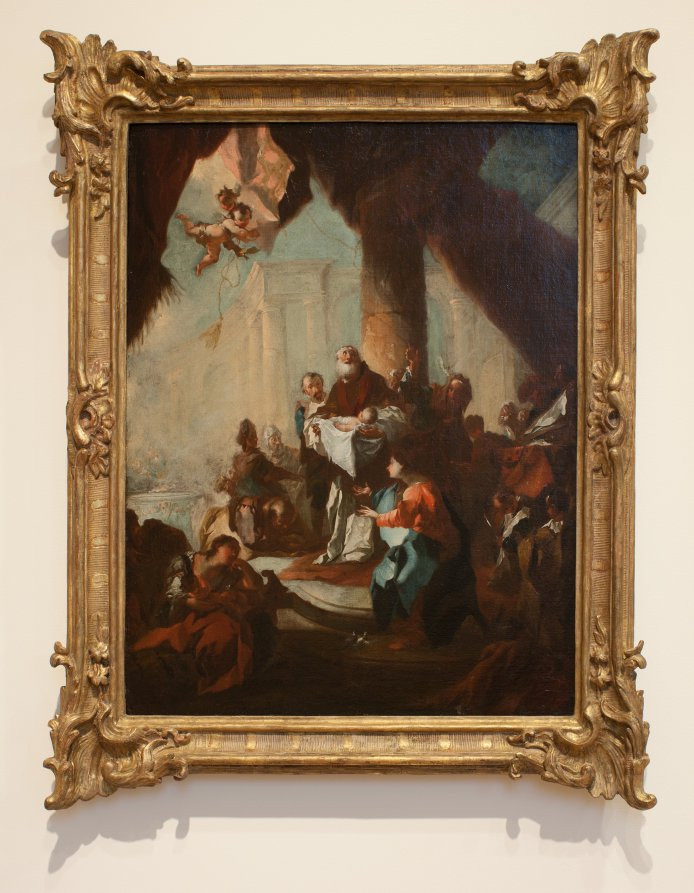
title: Study for "The Presentation of Christ in the Temple" (for Saint Ulrich, Vienna)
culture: Austria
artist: attributed to Franz Anton Maulbertsch (Austrian, 1724–1796)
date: c. 1750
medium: oil on canvas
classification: Painting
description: This loosely painted sketch is the preliminary design for an altarpiece in the Church of Saint Ulrich, Vienna. Mary and Joseph have brought the infant Jesus to the temple to be inducted into the Jewish faith; the aged priest Simeon cradles the infant in his arms, turning his gaze to heaven as he realizes that he is holding the Son of God. Strong contrasts of light and shadow underscore the drama of the moment. The frame is not original to this painting, but was made by an Austrian craftsman in the mid-1700s. Its florid style suits Maulbertsch’s flickering brushwork, and reflects the tradition of wood sculpture from Central Europe seen in other objects in the CMA's collection.